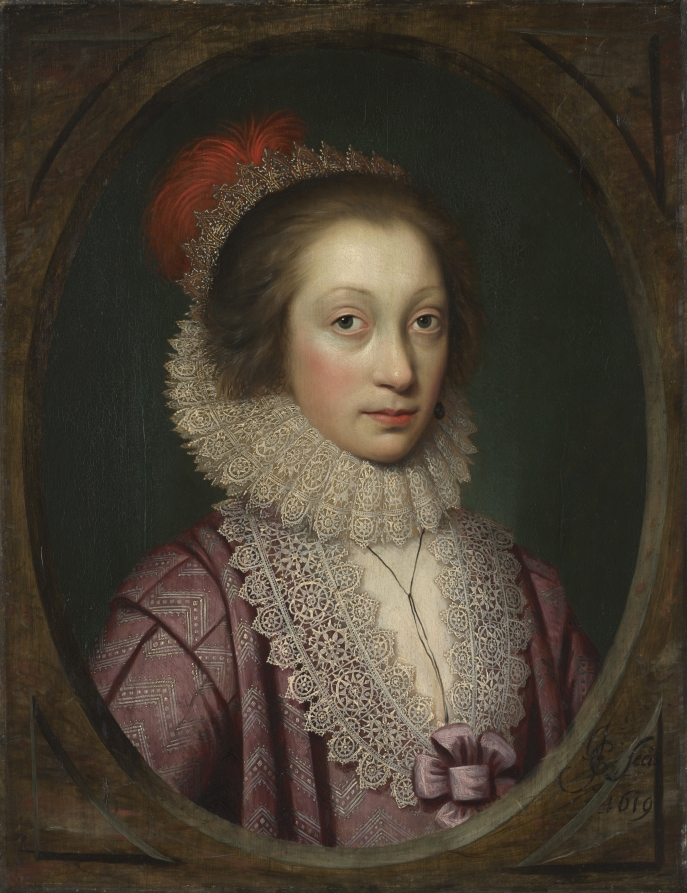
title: Portrait of a Woman, possibly Elizabeth Boothby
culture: England, 17th century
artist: Cornelis Jonson (called Jonson van Ceulen) (British, 1593–1661)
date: 1619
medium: oil on wood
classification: Painting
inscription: Signed lower right: "JC fecit. / 1619" [JC in monogram]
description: Research suggests that this portrait may depict Elizabeth Boothby (1590–1658), daughter of a prominent London merchant. The jewels in her hair, the silver thread and expensive lace adorning her silk gown, and even the faux marble oval surrounding her image are all signs of wealth and status. Although painted in England, this portrait reflects the traditions of Dutch portraiture, evidence of the fluid artistic exchange that existed between the two countries. Jonson was born in London, received his artistic training in Amsterdam, and spent the last 20 years of his career in the Dutch Republic.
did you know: For this prominent merchant's daughter, sparkling jewels and expensive lace were proud evidence of wealth.